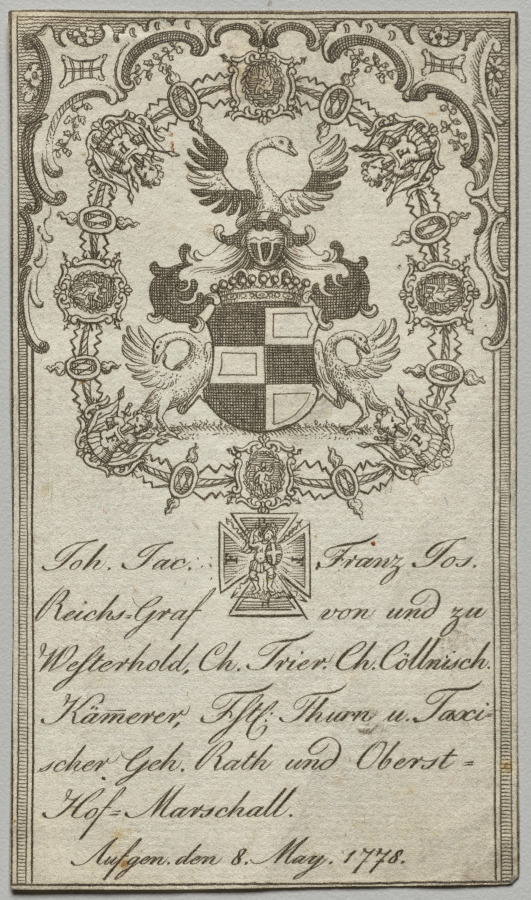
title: Bookplate: Johan. Jac. Franz-Joseph, Reichs-Graf von Westerhold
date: 1778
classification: Print